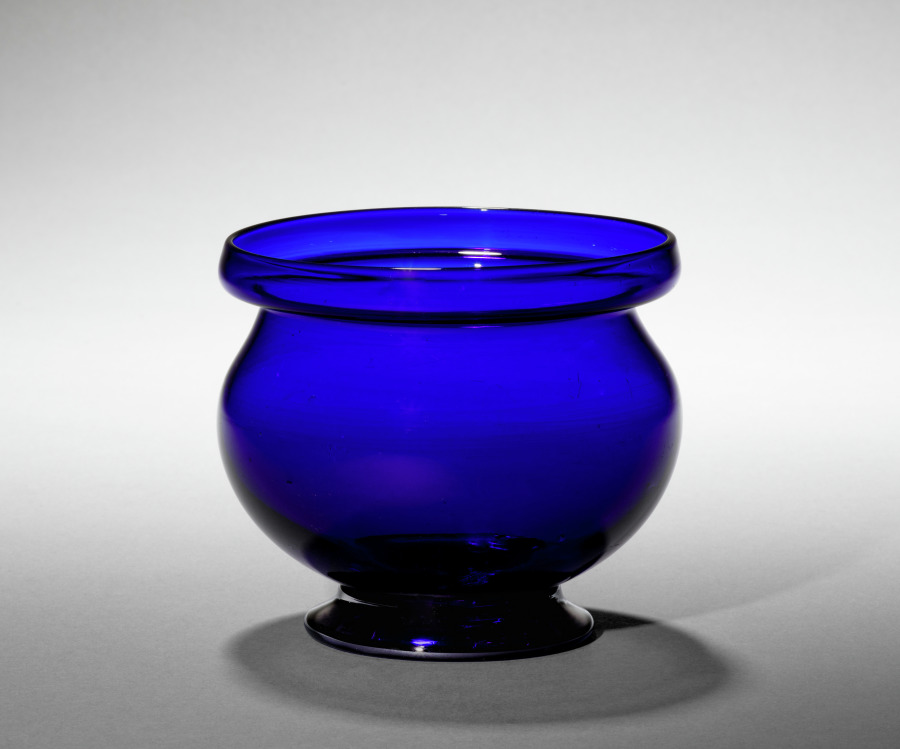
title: Sapphire Blue Sugar Bowl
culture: America, South Jersey Type, 19th century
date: c. 1840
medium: glass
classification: Glass